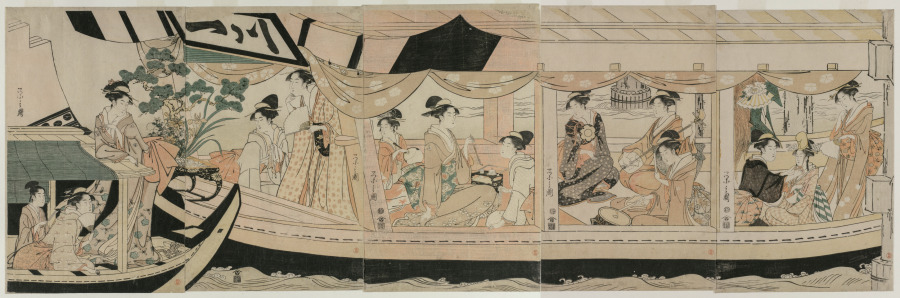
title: Party on the Pleasure Boat Kawaichimaru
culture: Japan, Edo period (1615–1868)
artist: Chōbunsai Eishi (Japanese, 1756–1829)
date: c. 1796–97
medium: Pentaptych of woodblock prints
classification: Print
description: A pleasure boat named Kawaichimaru is filled with entertainers in this expansive scene. At the vessel’s right end, a young dancer waits as her costume’s hat is arranged. In the middle, a trio of musicians performs, two on drums and another on shamisen, a three-stringed instrument. Listening to them is an elegant woman smoking her pipe. At the left end, three women, one on a neighboring boat, enjoy a spectacular floral arrangement of pine, lily, and iris on a lacquer stand.